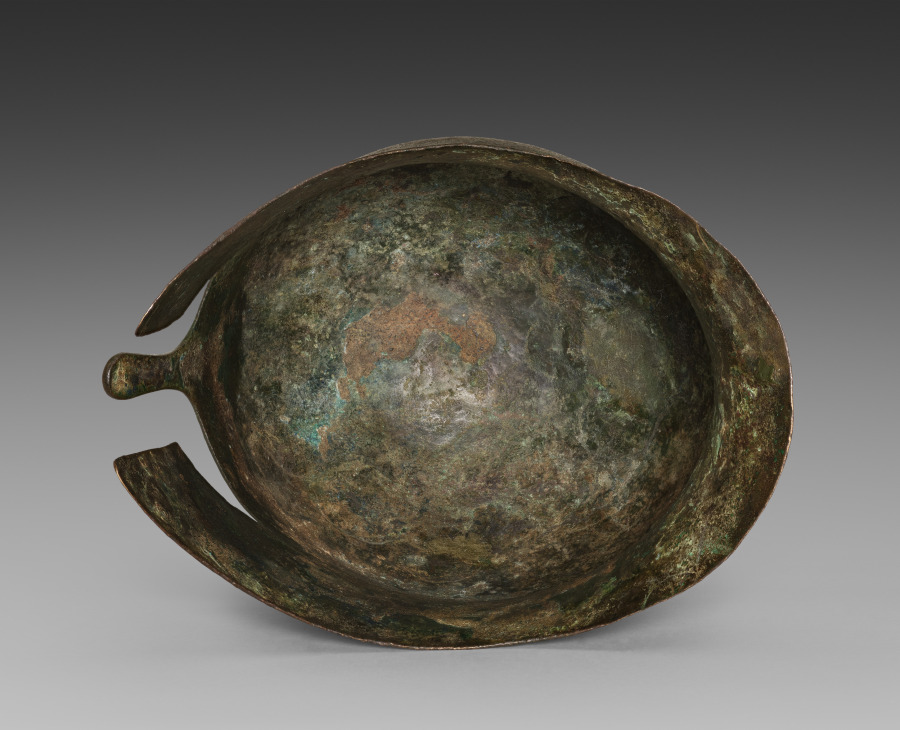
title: Corinthian Helmet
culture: Greek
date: c. 625–550 BCE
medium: Bronze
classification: Arms and Armor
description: This remarkably well-preserved bronze helmet belongs to an iconic type known as Corinthian yet produced far beyond the city of Corinth. Designed for use by hoplite warriors, who fought with spears and shields in shoulder-to-shoulder (phalanx) formation, such helmets provide maximum protection but limited vision, hearing, and movement. Probably first cast and then hammered into its final shape, the helmet features both gentle curves and sharp angles, evoking the head and face that it protected. Similar helmets appear frequently on warriors shown in ancient art, though often with crests of horsehair or other organic materials that no longer survive.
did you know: A small hole above the rear neckline, now repaired, may reflect a fatal blow.